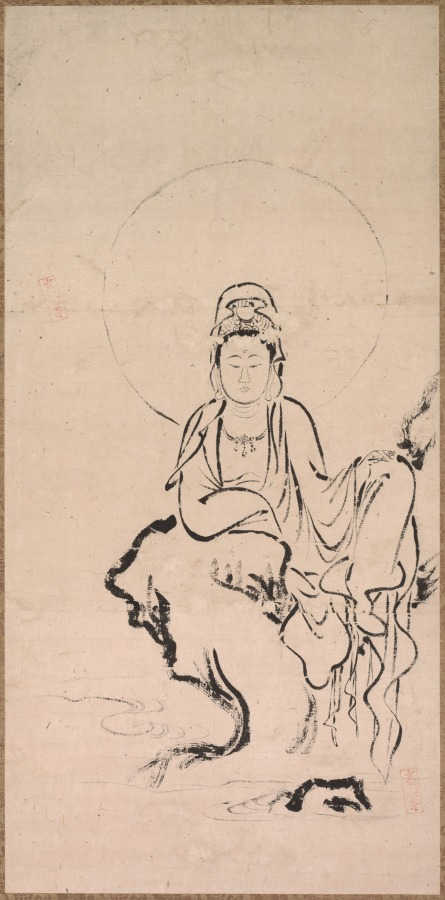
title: White-Robed Kannon (Byakue Kannon)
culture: Japan, Kamakura period (1185–1333)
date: c. 1200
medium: hanging scroll; ink on paper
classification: Painting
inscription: 箱書 石座観音 高山寺舊蔵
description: Kannon is a deity of mercy and compassion in the Buddhist faith. This monochrome sketch comes from Kōzan-ji, a temple in northwest Kyoto. The subdued ink tones and plain brushwork reflect the taste of Zen Buddhism, which began to have an impact on the visual arts in 13th-century Japan.